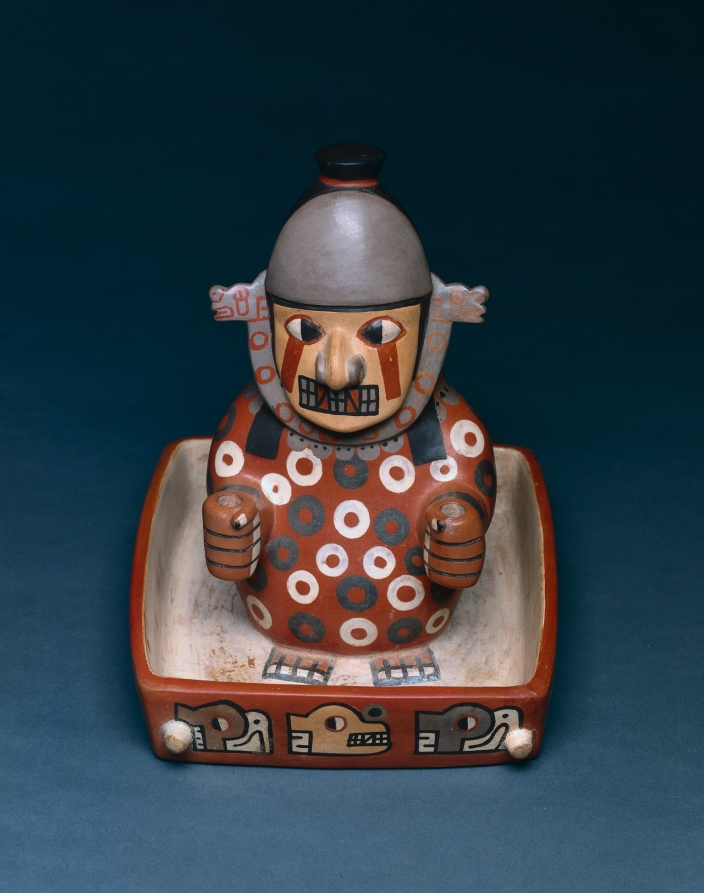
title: Figure in a Litter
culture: Wari (Pachacamac) style, Middle Horizon, Epoch 2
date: 500–900 (Thermoluminescence date, 590–1090)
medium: earthenware with colored slips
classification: Ceramic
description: Whether a deity, ancestral mummy, or masked human, this figure signals power. The divided eyes and fangs are traits of supernatural beings. The hands are cupped around holes that once perhaps held staffs, symbols of human and divine authority. And the litter was a mode of travel reserved for those of high station; the knobs refer to poles that rested on the shoulders of human bearers.